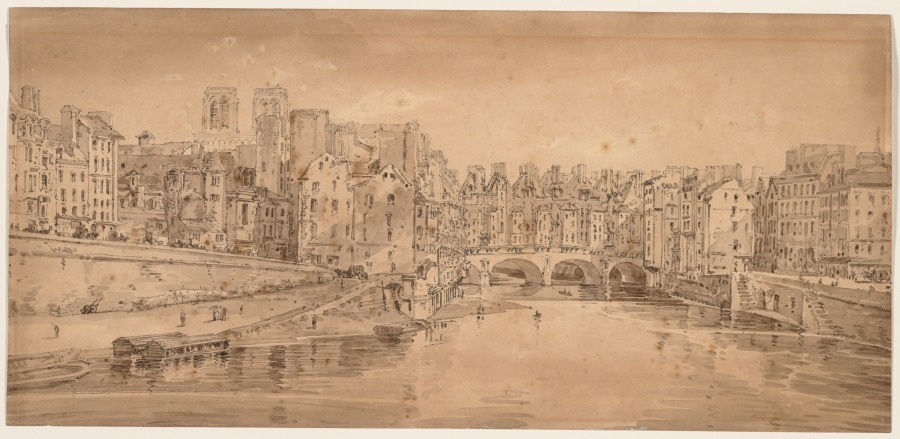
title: A Selection of Twenty of the Most Picturesque Views in Paris: View of Pont St. Michel, taken from Pont Neuf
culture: England, early 19th Century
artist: Thomas Girtin (British, 1775–1802)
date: 1802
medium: soft-ground etching with bistre wash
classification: Print